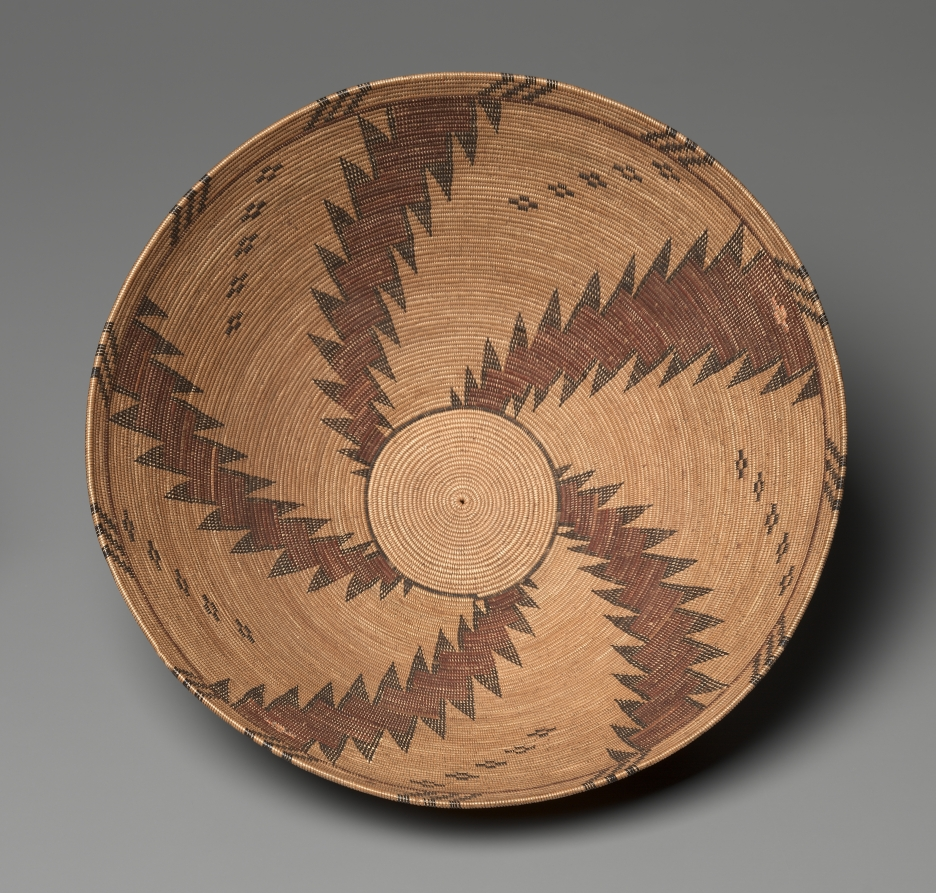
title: Presentation Bowl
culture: Native North America, Great Basin, California, Death Valley, Timbisha (Panamint) Shoshone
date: 1880–90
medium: devil's claw, sumac, yucca root, orange-shafted flicker (woodpecker) quills; coiled (2 rod and bundle of deer grass or basket grass)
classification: Basketry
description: This basket was made for the Euro-American collectors’ market in the early 1900s but it is modeled on basketry bowls from which the Timbisha (Panamint) Shoshone once served food. When used indigenously, the main view would have been of the interior. The two small, pink crosses, made of flicker (woodpecker) quills, may be a maker’s mark. Made-for-sale baskets testify to Indigenous women’s truly creative, resilient responses to forces that endangered their livelihoods and existence.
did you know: The two small, pink crosses on this basket may be a maker’s mark.